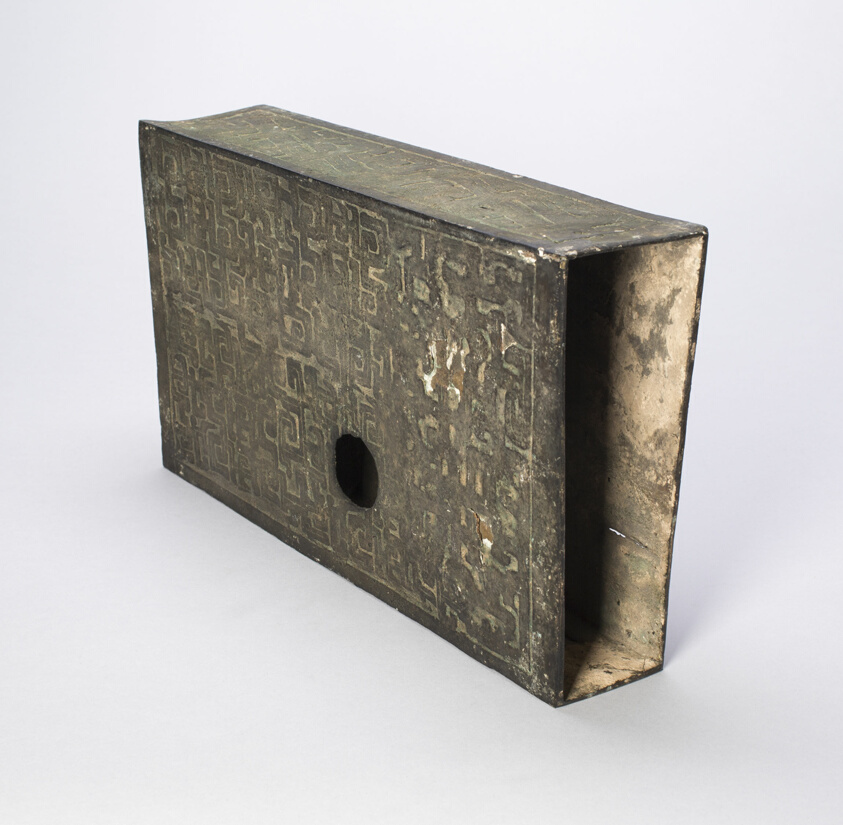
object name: Architectural fragment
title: Architectural Fitting (Gong)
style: Chinese (culture or style)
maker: Probably Shaanxi province, China; Bronze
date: Eastern Zhou dynasty, Spring and Autumn period (770–481 BCE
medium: Bronze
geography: China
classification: architectural fragment